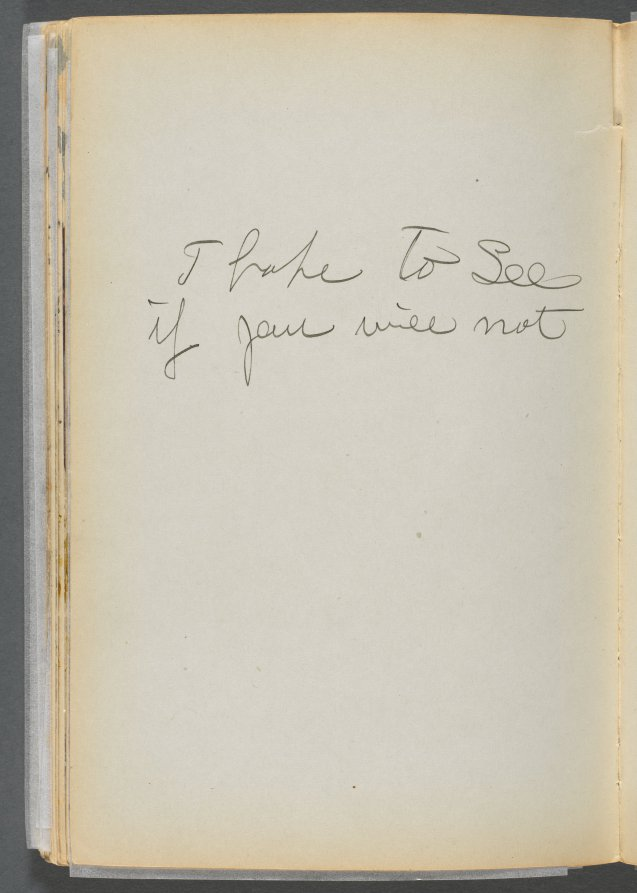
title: Sketchbook- The Granite Shore Hotel, Rockport, page 132: Notes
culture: America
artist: Maurice Prendergast (American, born Newfoundland [now Canada], 1858–1924)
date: c.1916/19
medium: graphite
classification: Bound Volume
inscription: by artist, lower center, in graphite: all green ; by artist, lower right, in graphite: sunlight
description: This sketchbook contains 72 pages of pencil drawings and 9 watercolors of Cape Ann. On the inside of the cover Prendergast wrote the address of the Granite Shore Hotel in Rockport, Massachusetts.